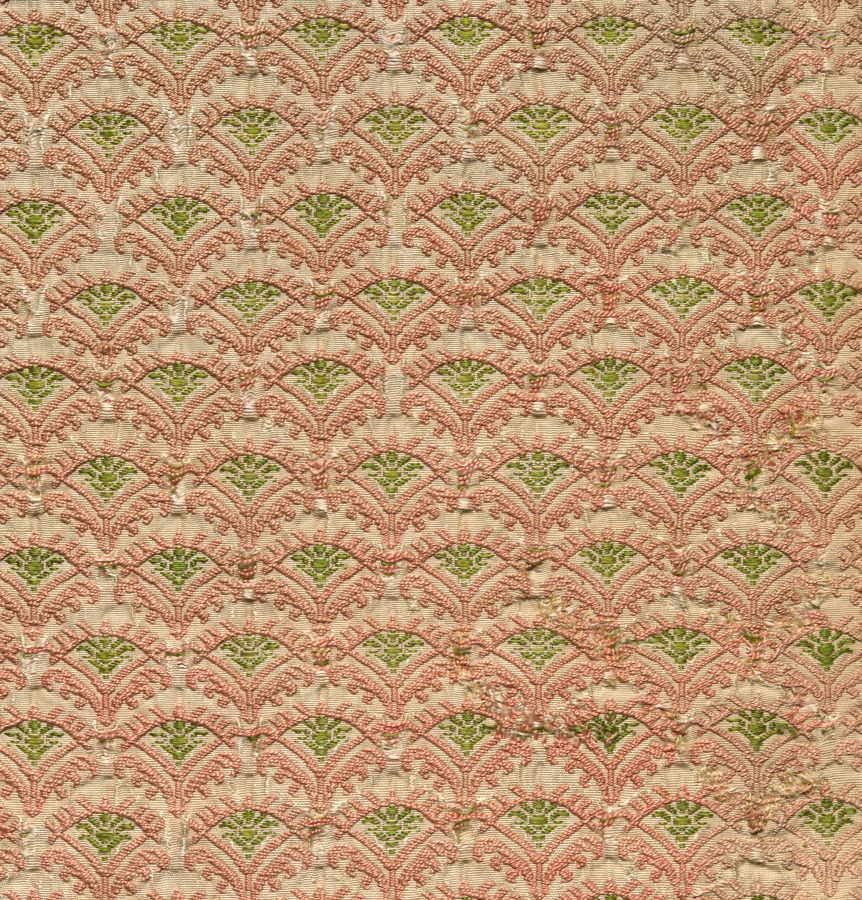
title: Fragment of a Chasuble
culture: Italy, 17th century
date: 1600s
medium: lampas weave (?), silk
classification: Textile